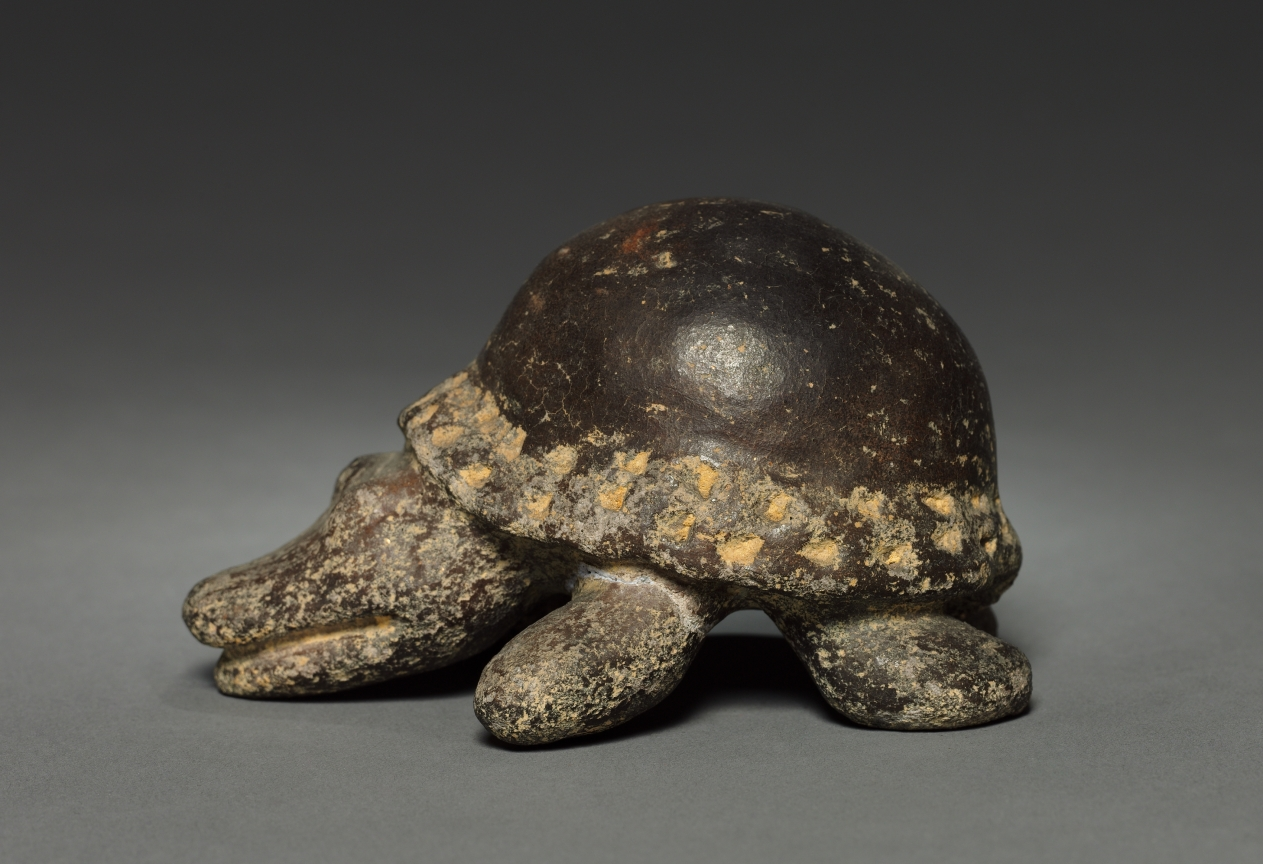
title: Turtle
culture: Colombia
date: before 1921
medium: pottery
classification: Ceramic